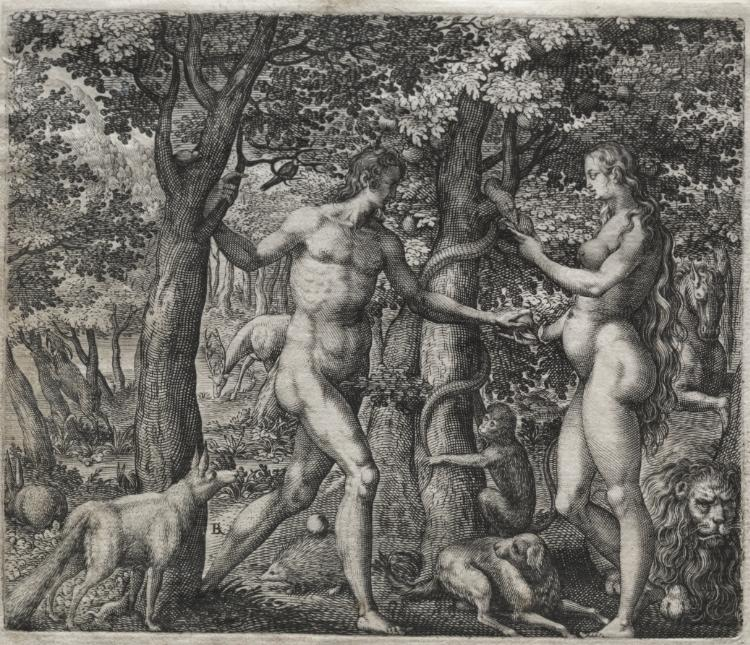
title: Adam and Eve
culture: France, 16th century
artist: Robert Boissard (French, 1570–after 1603)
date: late 1500s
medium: engraving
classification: Print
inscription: lower left, in plate: RB[in monogram]